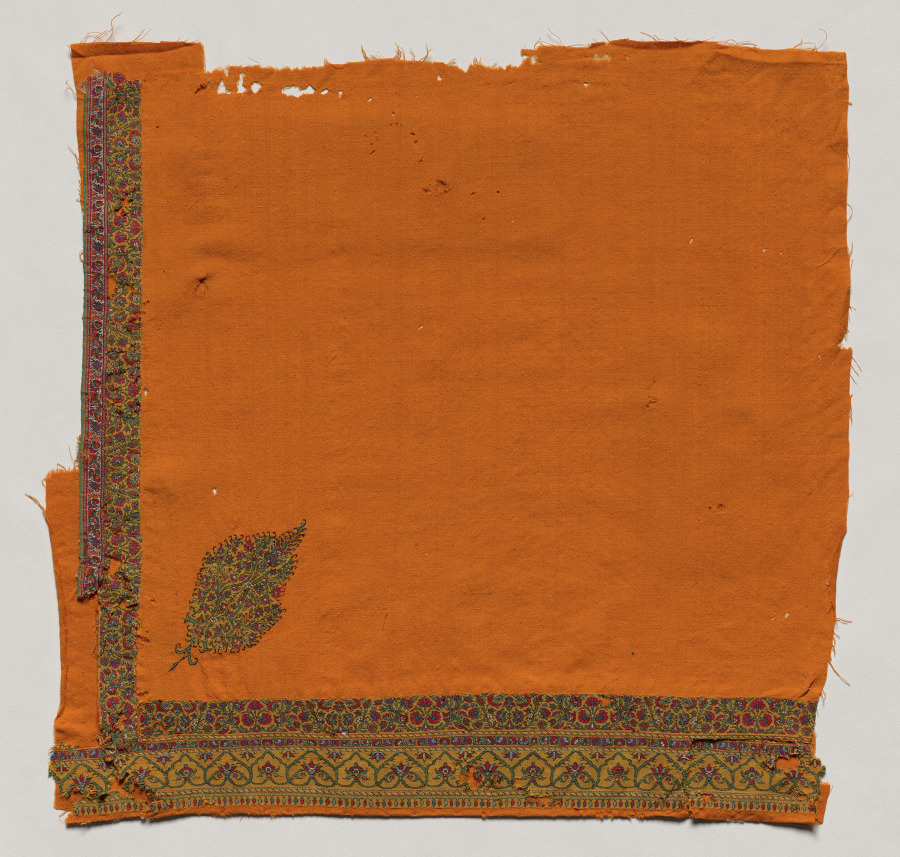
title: Corner of Fragment of a Shawl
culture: India, Kashmir, 20th century (?)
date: 1900–1924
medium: wool: tapestry twill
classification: Textile